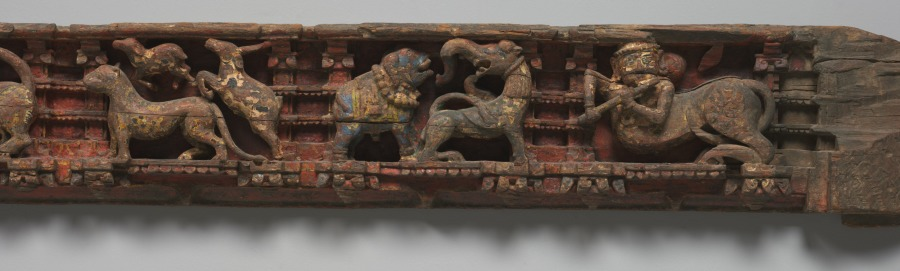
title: Narrative Frieze: Forest Retreat with Animals - Architrave from a Jain Temple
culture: India, Gujarat, 16th-17th century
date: 1500s–1600s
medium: wood with traces of color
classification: Sculpture